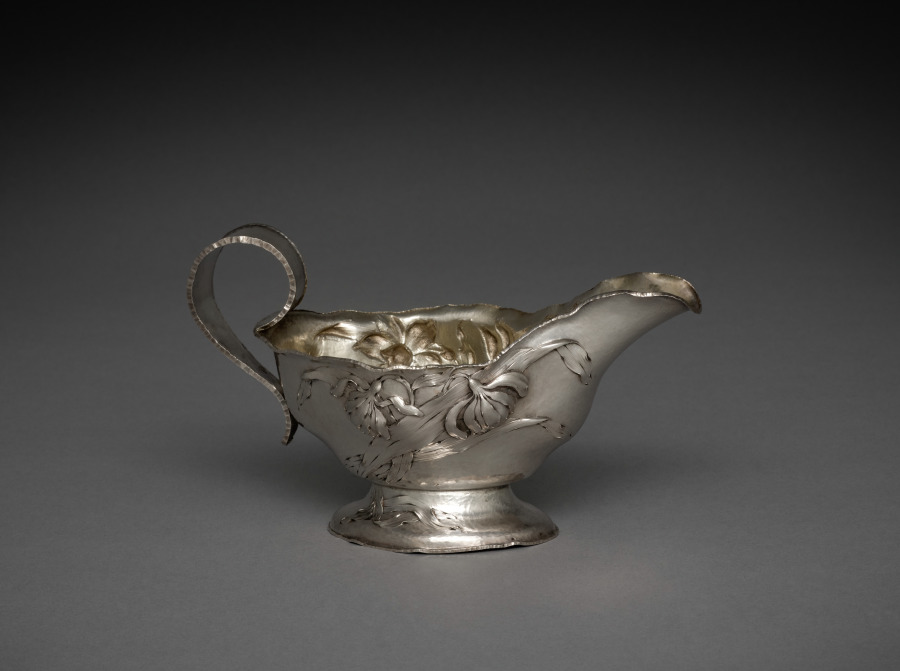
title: Sauce Boat and Tray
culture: America, Rhode Island, 19th century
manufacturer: Barbour Silver Company (American)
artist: attributed to William Christmas Codman (British, 1839–1921)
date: c. 1890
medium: silver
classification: Silver